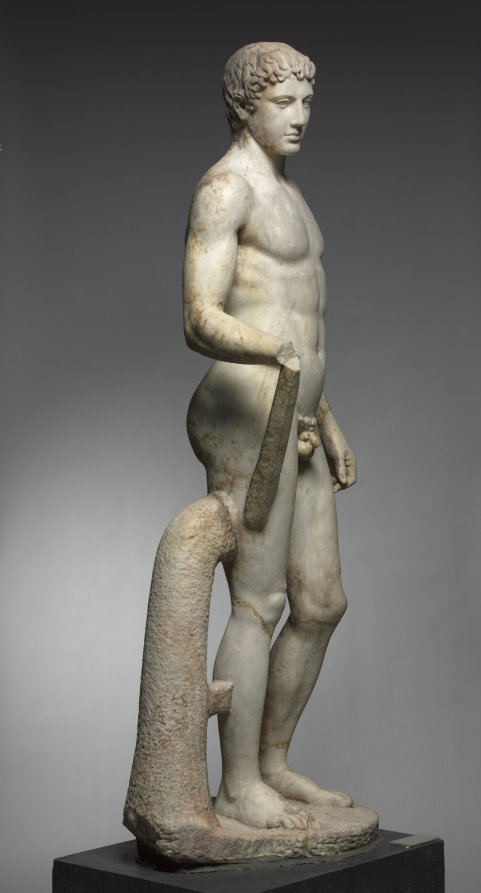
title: Statue of an Athlete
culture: Italy, Roman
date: 1–100 CE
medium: marble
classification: Sculpture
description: This idealized athlete recalls Greek sculptural types invented and popularized during the 400s BC. Large-scale athletes and other sculptures like this were originally created by famous artists as sanctuary dedications. Centuries later, they were widely copied and adapted by Roman sculptors, whose clients sought their own versions of earlier masterpieces. Working in marble rather than bronze, these sculptors added certain elements for stability, such as the struts and the large tree trunk beside the right leg here. Sculptures like this one are profoundly complex, made by and for Romans but descended from Greek ancestors.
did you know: For many years, this sculpture stood in the rotunda of the Cleveland Museum of Art.